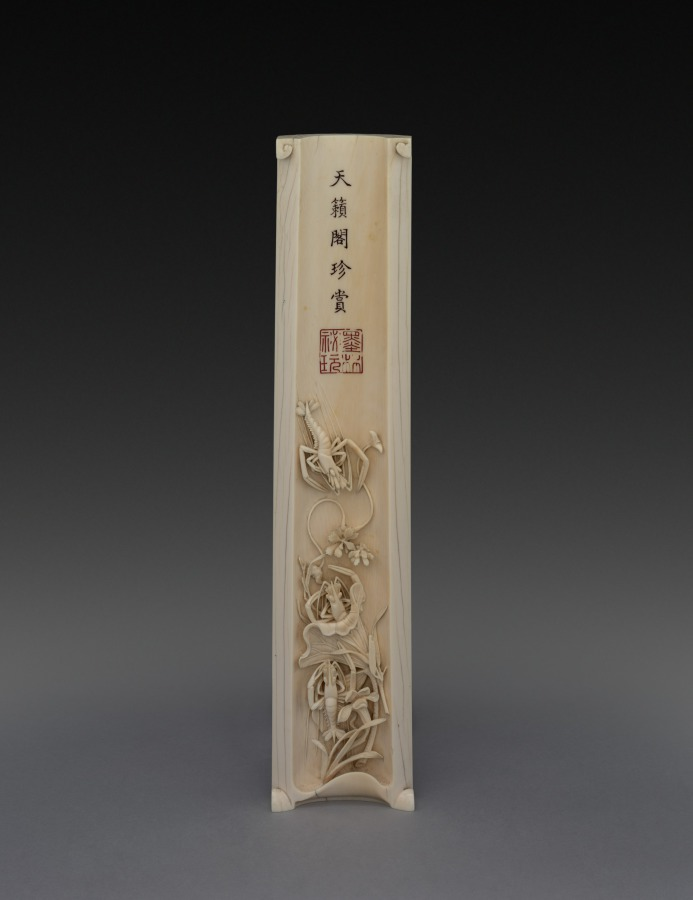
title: Wrist-Rest with Crayfish and Water Plants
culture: China, Qing dynasty (1644-1911)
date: 1700s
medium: ivory and polychrome pigment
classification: Ivory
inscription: Inside: Seal of Hsiang Yuan-pien; Reverse: Engraved poem by Wen P'eng (1498-1573)